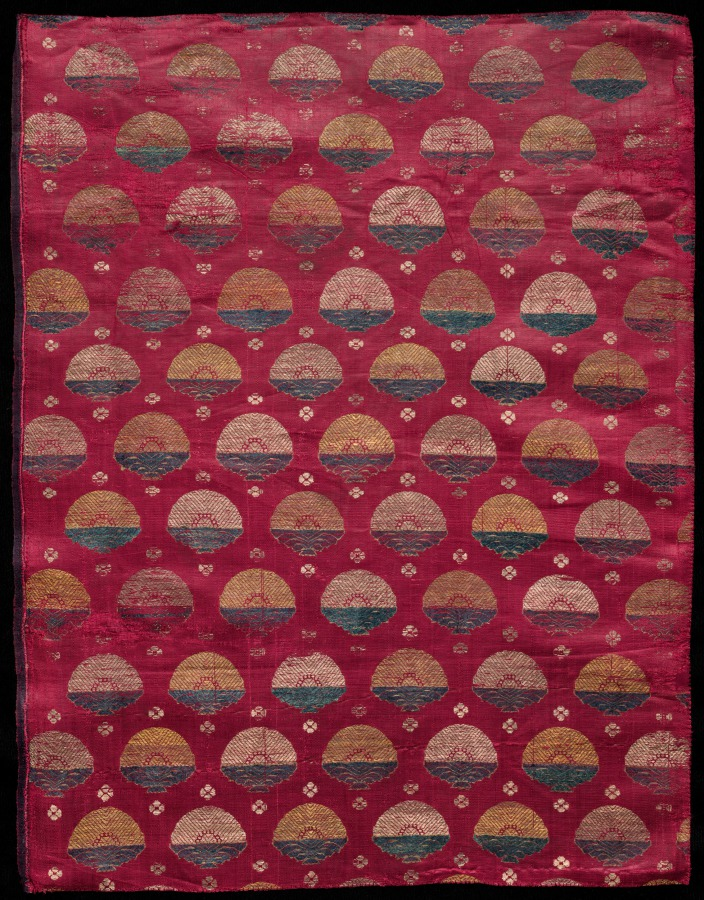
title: Brocade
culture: India, Surat or Benares ?, 18th or 19th century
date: 1700s or 1800s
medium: brocade, "kimkhwab"; silk with gold and silver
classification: Textile